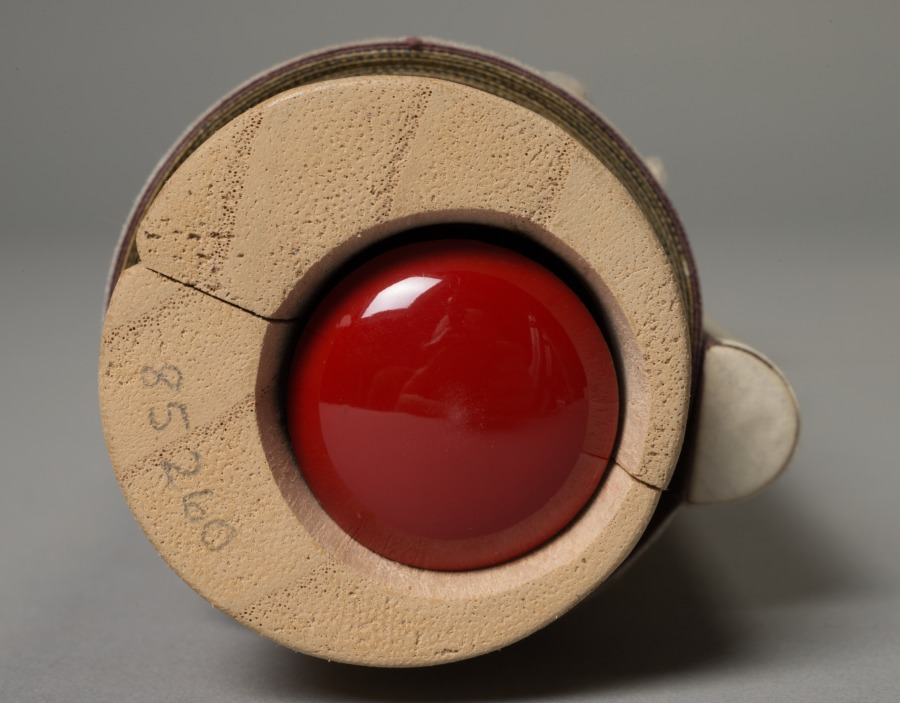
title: Woman Looking at the Moon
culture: Japan, Edo period (1615–1868)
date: 1800s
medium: hanging scroll; ink and color on silk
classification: Painting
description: In this scene, a woman pauses in her task of fulling cloth (pleating or gathering cloth to make it full) to gaze at the moon just as a flock of geese pass over. Perhaps overcome by the moment, she bites the end of her kerchief. The simple elements of fulling blocks, geese, and a full moon are traditional symbols of autumn in Japanese art. The pounding of the silk also has erotic connotations in East Asian painting. Although it is not signed, the style resembles work by painter Teisai Hokuba, known for his ukiyo-e or “pictures of the floating world.” Hokuba was an eminent disciple of the famed artist Katsushika Hokusai (1760–1849). The woman's white face appears to reflect the moon's surface. In Japan, the autumn harvest moon has many romantic associations and is a popular subject of poetry. In mid-autumn a Moon-Viewing Festival is held on the fifteenth night of the eighth lunar moon, which is regarded as the Harvest Moon. This festival became popular during the Edo period, when the citizens of the city of Edo enjoyed a festival in honor of the moon held on the banks of the Sumida River.